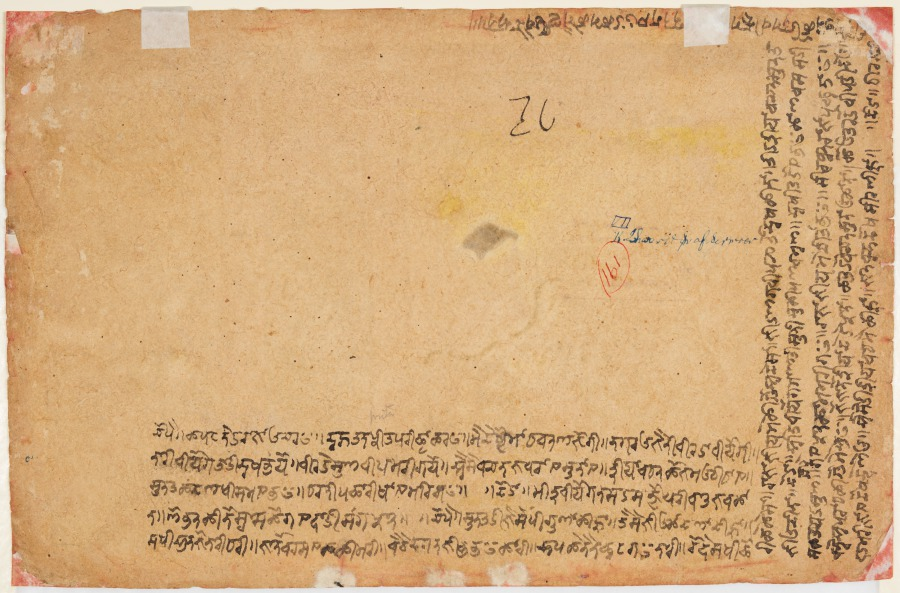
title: Kamakandala dies on hearing the news of Madhava’s death, folio 19 from a Madhavanala-Kamakandala of Alam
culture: Northern India, Pahari kingdoms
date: c. 1720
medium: gum tempera and gold on paper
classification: Painting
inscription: Takri number ‘19’ on verso; four lines of Takri script; (in English) Roman numeral: VII; K. Iswari Singh of Sirmur; number 191. caupai. kapata nahe rājā ucaraī. duhu tana prīta parīchā karaī. mai dekhyo mādhavanala jogī. nagara ujainī birahī biyogī. nārī bīyoge tāhī dukha bhayo. vīrahe sula vipa marī gayo. aise bacana jaba raye sunaye. lobha na dino suās ko gaye ahī saṃgī prāna. sunata hi jaise piṃgala kinā. vaise jiyu kandalā jinā. sakhiyāṃ jan jo nārī dhārī. jano baras ek ki māri. baithe dasan jibha bhari kāri. jhamake naina chuti gayi nāri. rovati sakhi chori ke kesā. rājā jibha mai kari andesā. jiha laga bipa ito dukha kinā. tina trihā bacana sunata jiva dinā. dohā. ali biyoga jima malatī sukhī pallavā sulā. dukhata muta bhayī kama basa sahī na sakata urī sula. caupai. gaye prāna kāma mari gayi. rājā ke man chintā bhaī. sir dhuni dhuni dehe prāna. kat ho bacana munavahi kāna. kauna utarī ho bīpātī deve. vaha mari jāyī dokha yohi leve. chali karī tīraha badha main kīnā. janī bujhī pāpa mai linā.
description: Having seen how desperately Madhava loves Kamakandala, King Vikrama decides to test Kamakandala to ensure she loves him equally. Time is compressed in this scene. King Vikrama is shown delivering the false news that Madhava died from a broken heart. In response, Kamakandala faints, and her friend sees that her tongue has turned black, according to the poem. Kamakandala then dies, and her friends cry and wail, letting their hair loose in an act of mourning; the king’s groom looks downcast. At the end, Madhava dies after hearing of Kamakandala’s death. King Vikrama is seized with deep regret, until a celestial being restores their lives, and the lovers are reunited.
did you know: The scene is set at night with a star-studded sky.